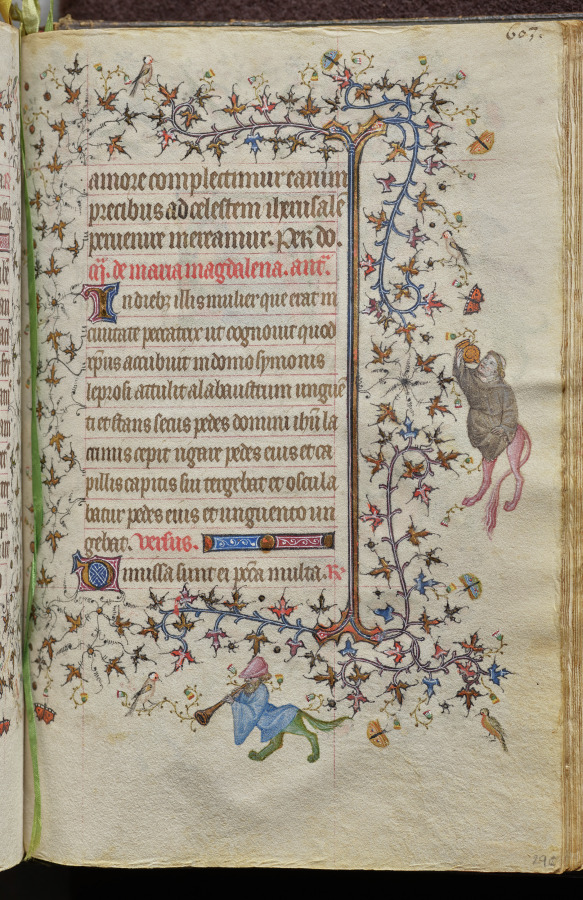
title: Hours of Charles the Noble, King of Navarre (1361-1425): fol. 296r, Text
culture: France, Paris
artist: Master of the Brussels Initials and Associates (French)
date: c. 1405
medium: ink, tempera, and gold on vellum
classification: Bound Volume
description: This precious volume was obviously highly prized by its owner, the French-born King of Navarre, who had his coat of arms painted on no less than twenty folios. Rather than directly commissioning this manuscript from a specific workshop, it seems that Charles the Noble acquired his book of hours -- perhaps ready-made for the luxury market -- while on a trip to Paris in 1404-05. A collaborative effort, six painting styles are evidenced within the pages of this codex, those of two Italians, two Frenchmen, and two Netherlanders. The painter who was responsible for the planning and decoration of the book, and who produced seventeen of the large miniatures, was a Bolognese artist known as the Master of the Brussels Initials. His principal assistant, responsible for most of the borders, was a Florentine who signed his name "Zecho" da Firenze on folio 208 verso.